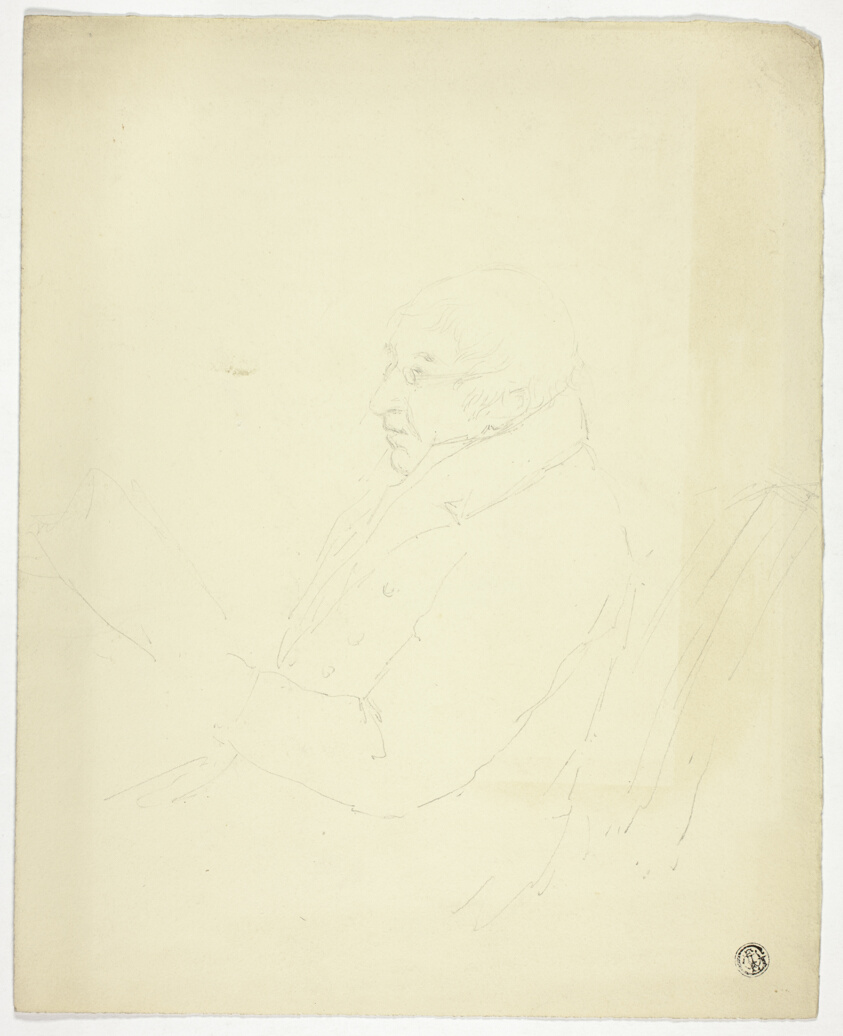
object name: Drawing and Watercolor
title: Profile of Man with Glasses Reading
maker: Elizabeth Murray (English, c. 1815-1882)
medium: Graphite on cream wove paper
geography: England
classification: graphite; drawings (visual works); prints and drawing